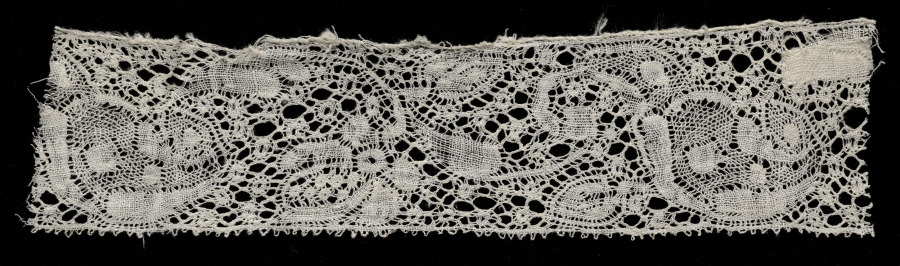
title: Lace Edging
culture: Spain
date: 1700s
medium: Bobbin lace (Antwerp lace)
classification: Lace